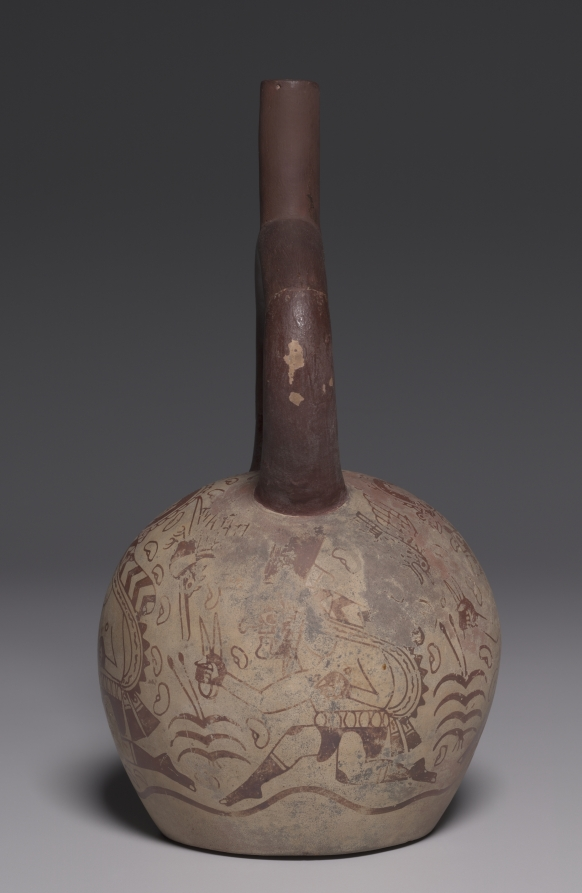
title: Vessel with Running Figures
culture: Peru, North Coast, Moche style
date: 450–550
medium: earthenware with colored slips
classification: Ceramic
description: Moche painters were masters at capturing the peak of physical activity. On this vessel are runners whose legs seem to churn so fast they ripple the desert groundline. Such runners, common in Moche art, always carry small bags, the contents open to question. But beans sometimes float around the runners, as here, suggesting they are involved in a ritual for planting. Beans also may have been used in rituals to divine the unknown.